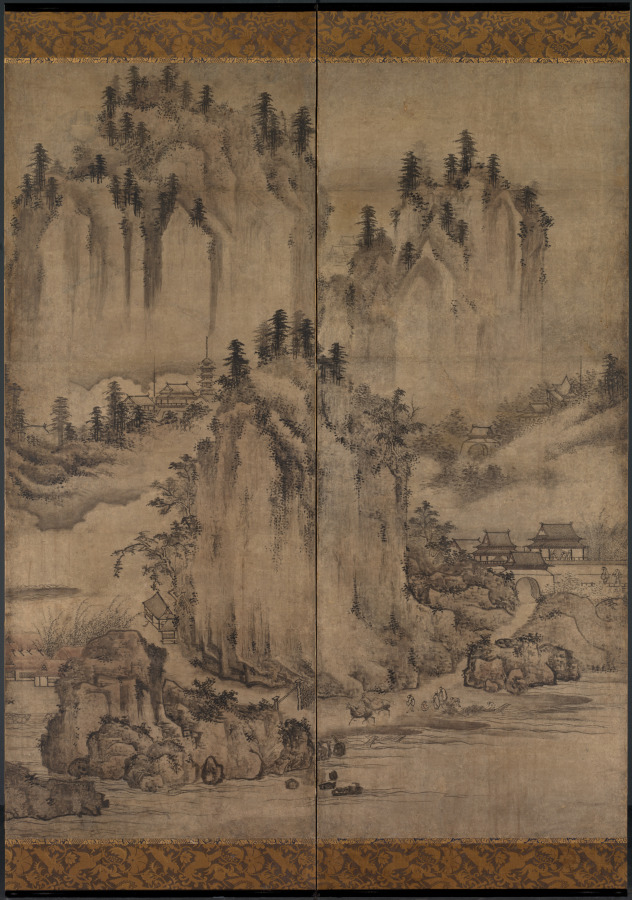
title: Landscape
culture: Japan, Muromachi period (1392–1573)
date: 1550–99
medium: One of a pair of six-panel folding screens; ink and color on paper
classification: Painting